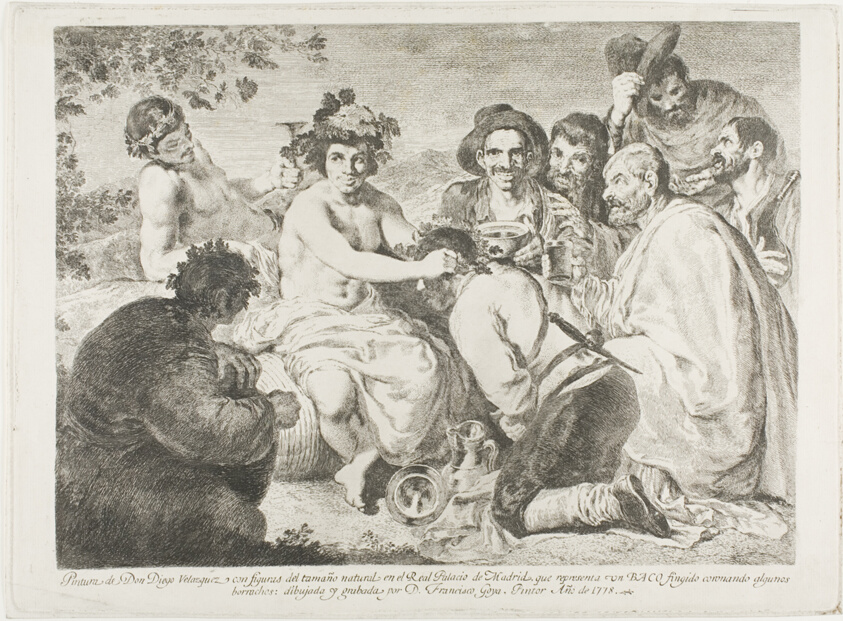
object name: Print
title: The Drunkards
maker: Francisco José de Goya y Lucientes (Spanish, 1746-1828); after Diego Velázquez (Spanish, 1599-1660)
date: 1778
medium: Etching with engraved inscription on ivory laid paper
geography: Spain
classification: etching; print; prints and drawing